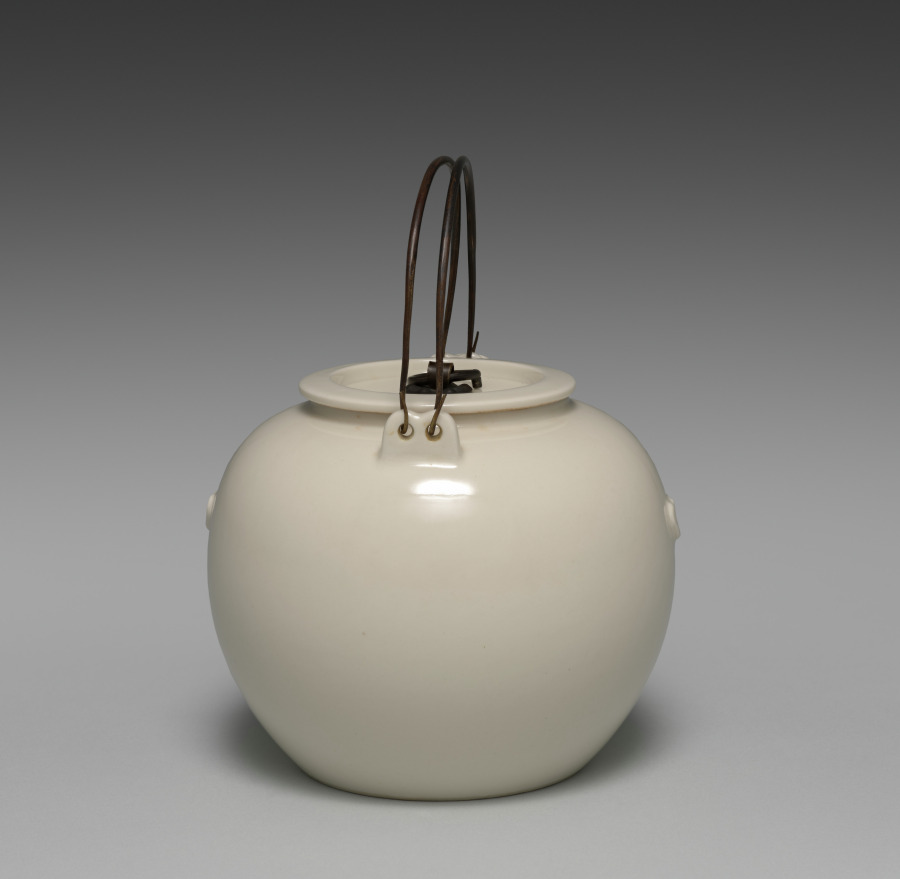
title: Teapot with Ruyi Motifs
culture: Japan, Meiji period (1868–1912)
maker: Seifū Yohei III (Japanese, 1851–1914)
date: 1893–1914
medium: Porcelain with molded design and iron handles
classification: Ceramic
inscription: The base of the pot has a “Seifu” seal.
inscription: Inscription on the box dated to 1960.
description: The simple, round form of this teapot is embellished with only a pair of nyoi staff-head motifs, one on each side. Two arched iron handles, parallel to each other, are hooked through holes in raised tabs at the front and back of the shoulders of the pot. The round lid is depressed so that an iron ring handle fastened with an iron clamp passing through the lid can lie flat inside the recessed area. The box is not original to the piece and has an inscription dated to 1960. The person who wrote it clearly admired Yohei III and his efforts to produce works that resembled Chinese ceramics. The inscription describes Yohei’s journey to perfecting these copies but misidentified the Chinese kiln whose wares were the basis for this particular work.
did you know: The base of the pot has a “Seifu” seal.